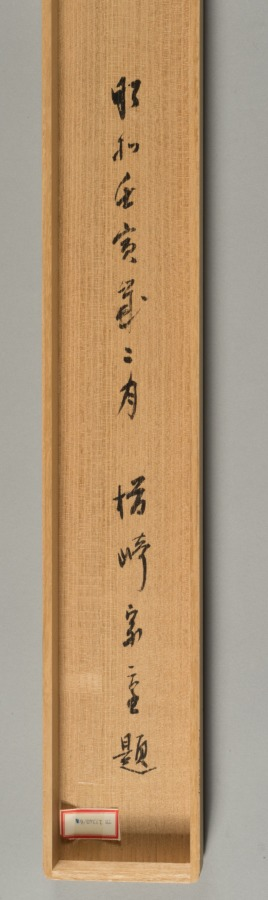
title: Beauties at the Seashore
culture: Japan, Edo period (1615–1868)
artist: Ippitsusai Bunchō (Japanese, active c. 1765–92)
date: c. 1765–92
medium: hanging scroll; ink and color on paper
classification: Painting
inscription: Undeciphered, severely faded seal in lower right corner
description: Bunchō portrays the popular subject of cooling off by the water on a late spring or early summer evening, as suggested by the willow. The seated lady enjoys her pipe-smoking—a popular pastime for Edo women. In the background, some fireworks are set off from a small boat.